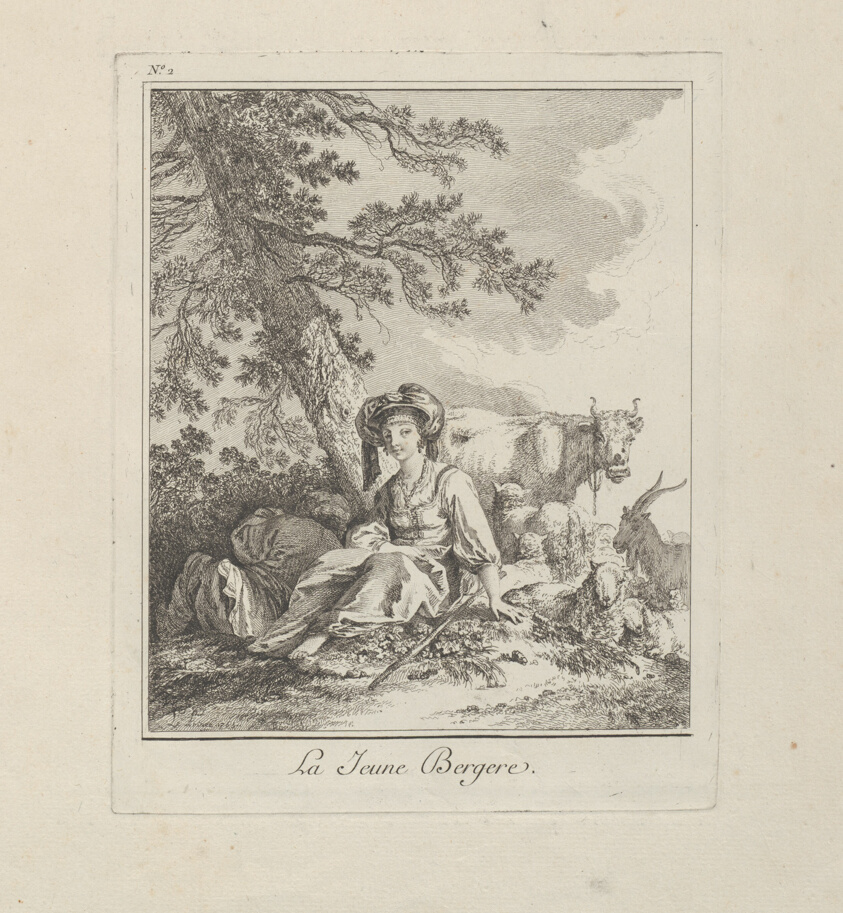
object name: Print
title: The Young Shepherdess, plate two from Divers Habillements des Peuples du Nord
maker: Jean-Baptiste Le Prince; French, 1734-1781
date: 1765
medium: Etching on ivory laid paper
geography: France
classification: etching; print; prints and drawing